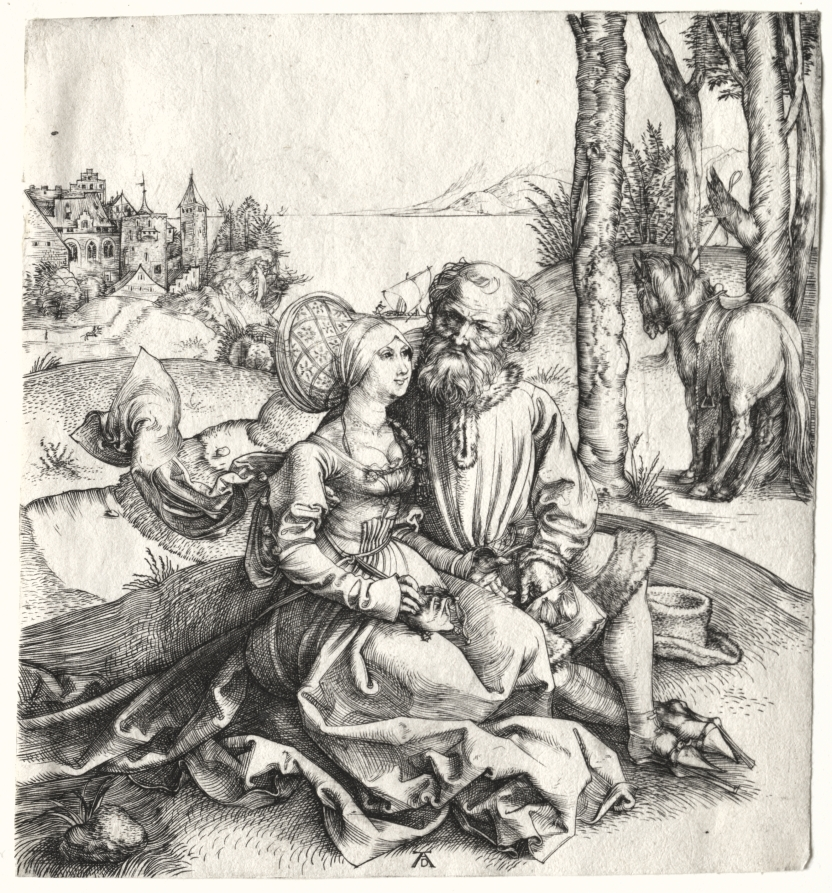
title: The Offer of Love (or The Ill-Assorted Couple)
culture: Germany, late 15th-early 16th Century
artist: Albrecht Dürer (German, 1471–1528)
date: 1495–1496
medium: engraving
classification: Print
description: In the late 15th century, moralizing scenes of mismatched lovers were popular subjects for prints. In one variation of the theme, a young woman seduces an unwitting old man in order to steal his money. In Dürer’s version here, however, the male figure willingly reaches into his purse to pay for his younger companion’s affections.